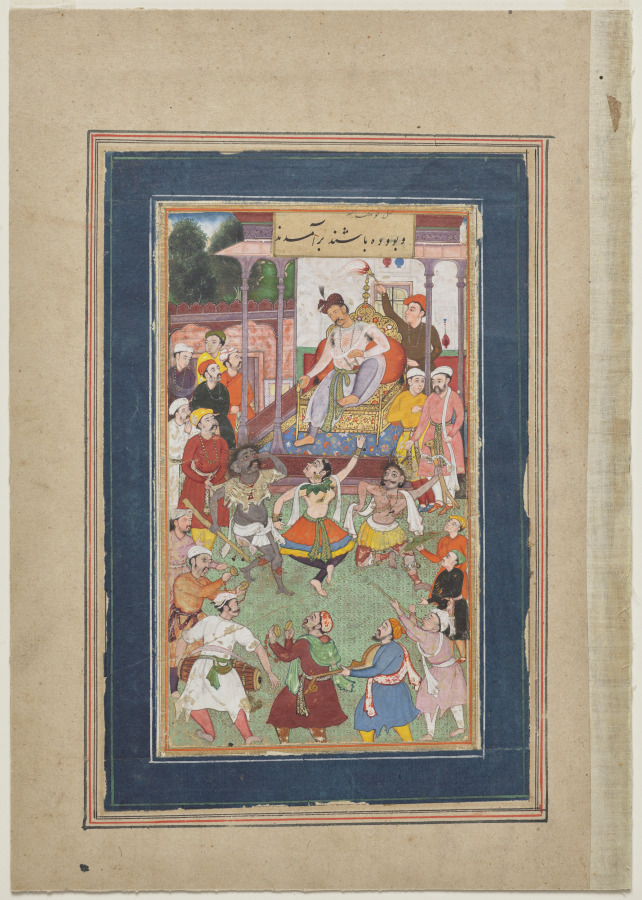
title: Grotesque Dancers Performing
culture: Mughal India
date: c. 1600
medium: gum tempera, ink, and gold on paper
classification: Painting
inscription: Unrelated later Persian text on recto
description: This scene from an unidentified manuscript depicts entertainers at the Mughal court. The dancers appear to be from the fringes of society, and they may be intended to depict tribal people or semihuman nature spirits. One is dark skinned with small elephant ears and red-rimmed eyes, wearing a white tiger-skin pelt. The female dancer wears a collar of leaves; the male figure on the right has horns, wears bells, and carries an animal-headed club that appears to be made of bone. An exuberant orchestra provides musical and vocal accompaniment below. While not an imperial production, this painting may reference the Mughal emperor Akbar’s practice of welcoming a wide range of people from all regions and traditions to his court, since he was interested in understanding their customs.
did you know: Akbar applied an aromatic paste under his arms, which stained his garment.